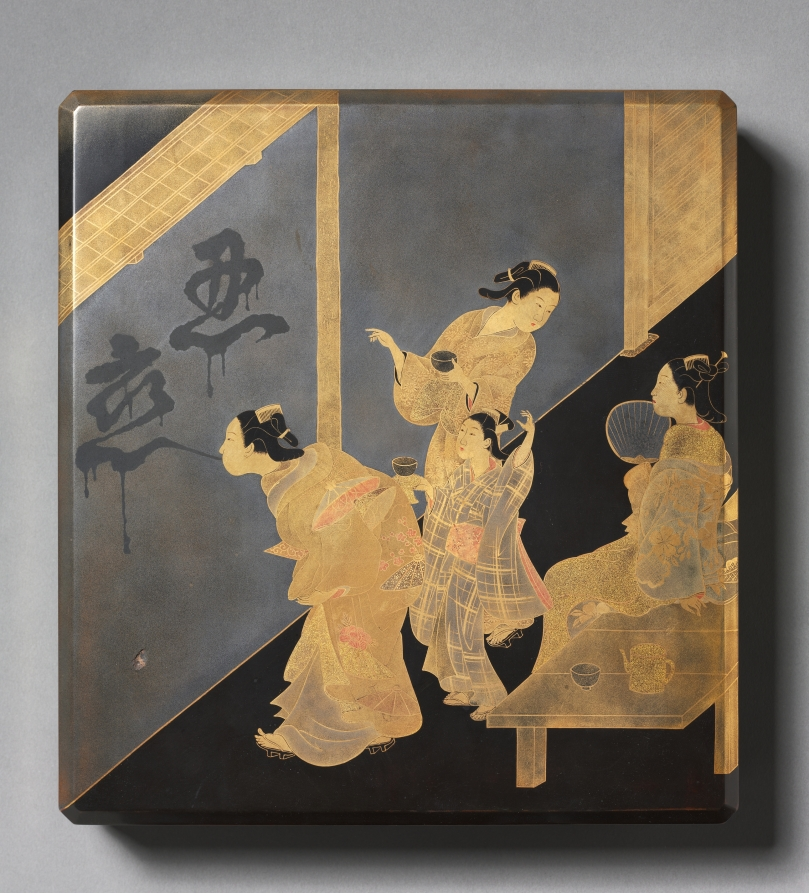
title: Writing Box with Spitting Courtesan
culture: Japan, Edo period (1615–1868)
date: early to mid-1800s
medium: Lacquered wood with maki-e (image made of sprinkled gold dust)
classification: Lacquer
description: The design on this writing box shows a courtesan who has just completed an impressive feat of spitting the term shinobukoi (忍恋), which could be translated as “hidden love” or “unrequited love,” on an earthen wall. The phrase appeared in classical Japanese poetry anthologies produced by nobles writing in ink on the finest decorated papers. Here, the confining walls of the brothel district become a space for public announcement in graffiti, with the medium being perhaps tea.